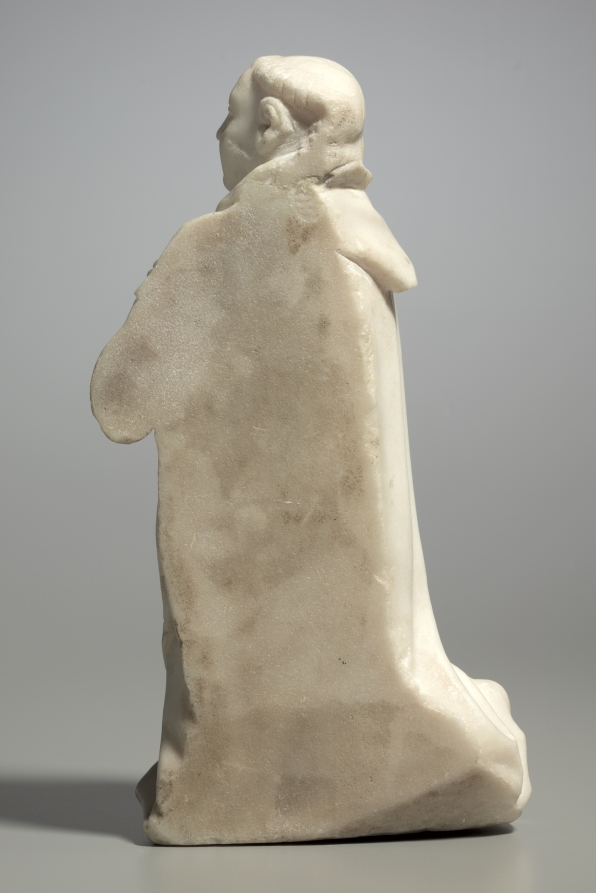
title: Kneeling Carthusian Monk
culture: France, Burgundy, Dijon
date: c. 1380–1400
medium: marble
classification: Sculpture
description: These are the only known surviving sculpted examples of kneeling Carthusian monks. Depictions of Carthusians in the same act of piety are found in paintings such as the one in this room from the Chartreuse de Champmol. These two figures are believed to come from the same Carthusian monastery as the mourners displayed nearby and would have formed part of a private devotional group, probably in a monk’s cell, with a sculpture of the crucified Christ or the Virgin positioned between them. They wear the recognizable white scapular, a hooded garment with front and back panels tied together with a tab.